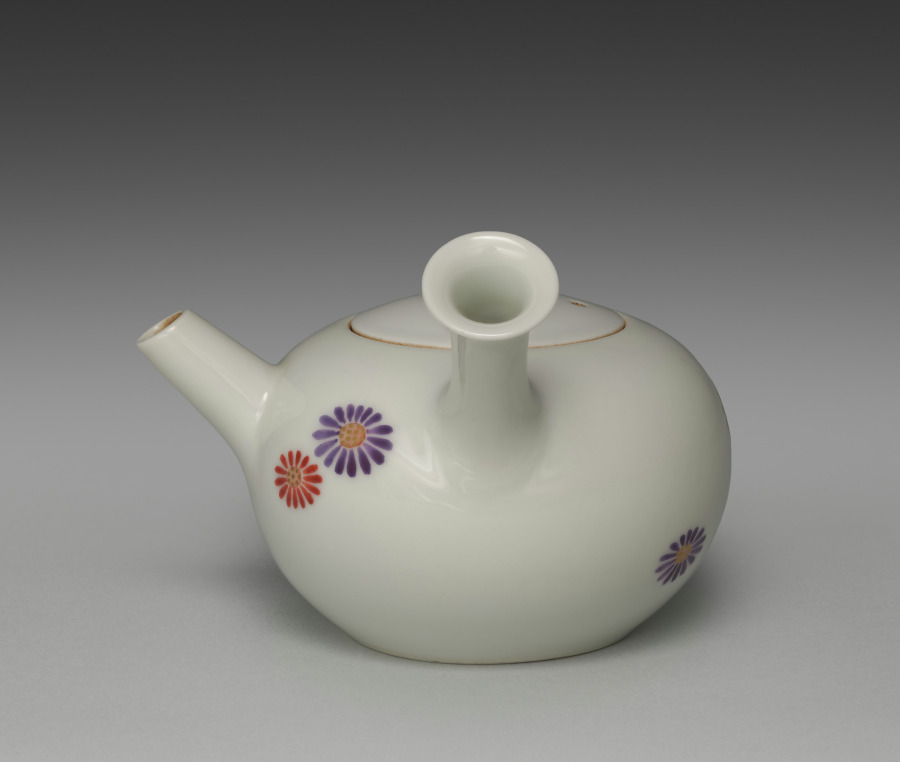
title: Teapot with Chrysanthemum Motifs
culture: Japan, Meiji period (1868–1912)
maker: Seifū Yohei III (Japanese, 1851–1914)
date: 1912–14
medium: Porcelain with overglaze color enamel and gold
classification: Ceramic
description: This side-handled sencha teapot has the lid flush against the body, forming an oblong orb. It is decorated with a sprinkling of similar chrysanthemum motifs in red, green, and purple overglaze color enamels with centers of pale red dotted with gold.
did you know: This teapot with chrysanthemum motifs shows off Seifū Yohei III’s technique of enamels painted over the glaze.